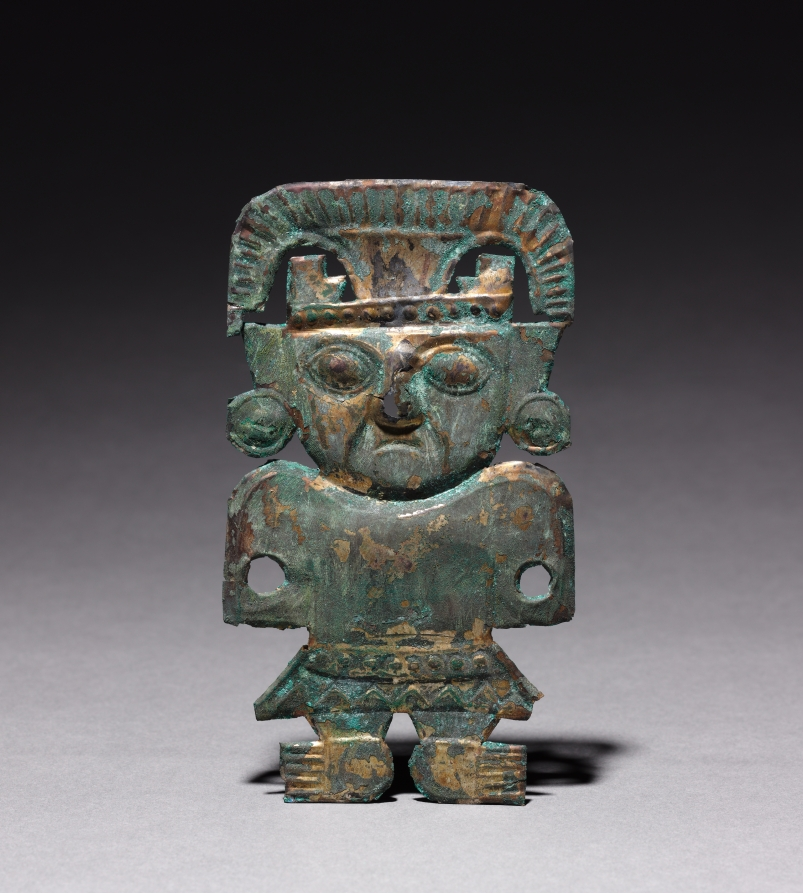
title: Plaque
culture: Peru, North Coast, late Chimú Culture, 14th-15th century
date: 1300s-1400s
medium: bronze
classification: Metalwork